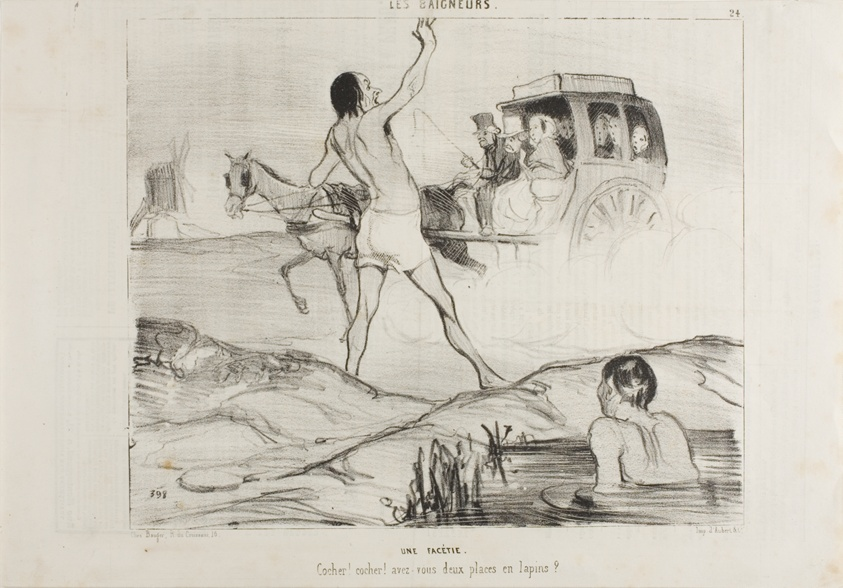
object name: Print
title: A Practical Joke. "Driver! Driver! Do you still have two seats in the rabbit section??,” plate 24 from Les Baigneurs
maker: Honoré Victorin Daumier; French, 1808-1879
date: 1842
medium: Lithograph in black, with scraping on stone on white wove paper, with letterpress verso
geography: France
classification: lithograph; print; prints and drawing